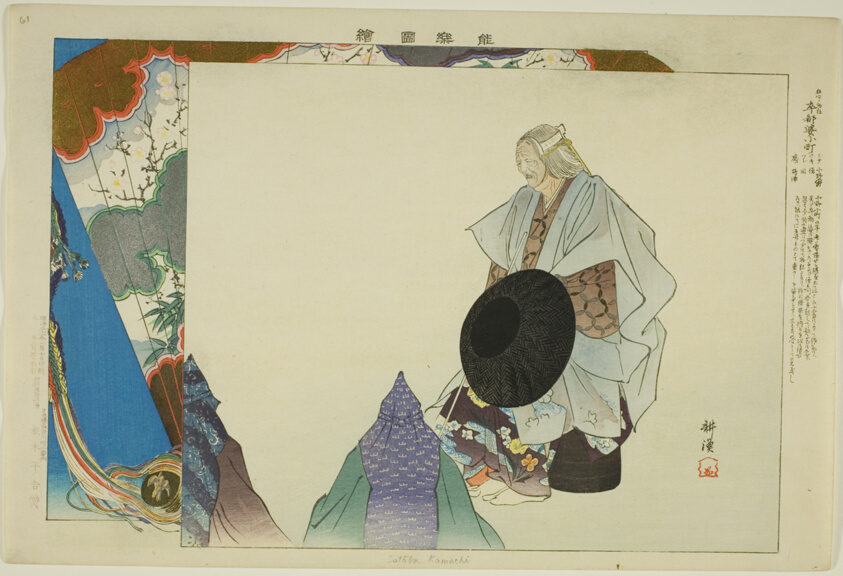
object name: Print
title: Sotoba Komachi, from the series "Pictures of No Performances (Nogaku Zue)"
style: Japanese (culture or style)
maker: Tsukioka Kogyo; Japanese, 1869-1927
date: 1898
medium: Color woodblock print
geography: Japan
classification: woodblock print; print; asian art